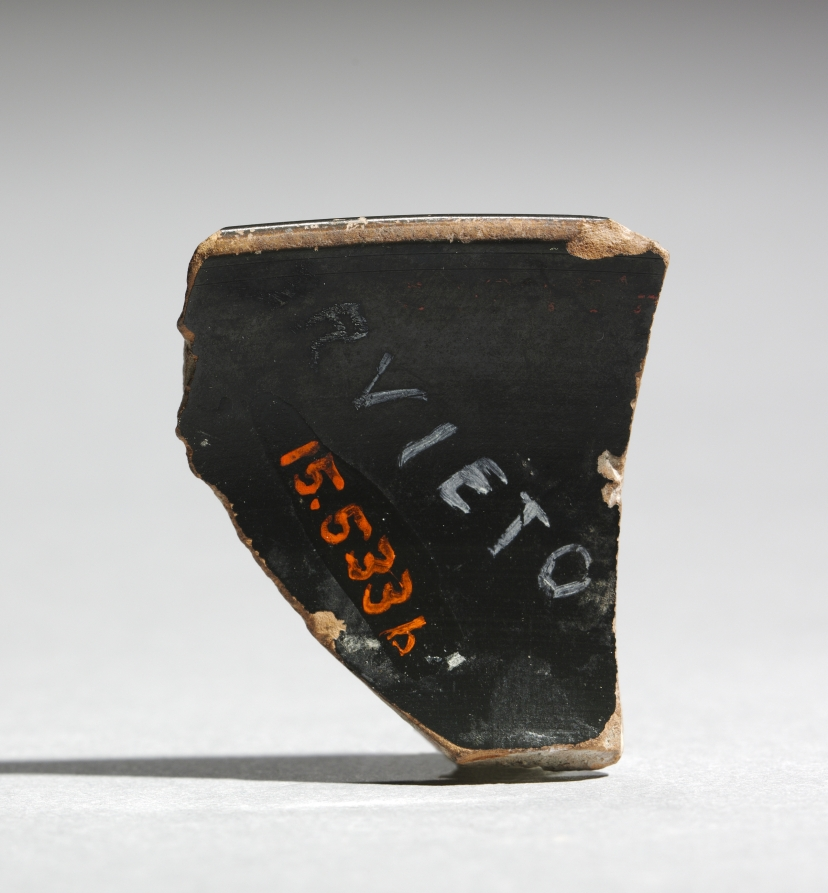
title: Fragment from Red-Figure Cup: Woman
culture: Greek, Attic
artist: near the Telephos Painter (Greek, Attic, active 480–460 BC)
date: c. 470–460 BCE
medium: ceramic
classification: Ceramic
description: A bit of preserved lip shows that this fragment comes from a kylix, or drinking cup. A finely dressed woman, with earring and headband, reaches out with her right hand, now lost but once holding a wreath in added red paint. Relief lines standing above the surface outline the face, neck, arm, and other details.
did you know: Painted on the back side of this fragment is ORVIETO, its likely findspot more than a century ago.